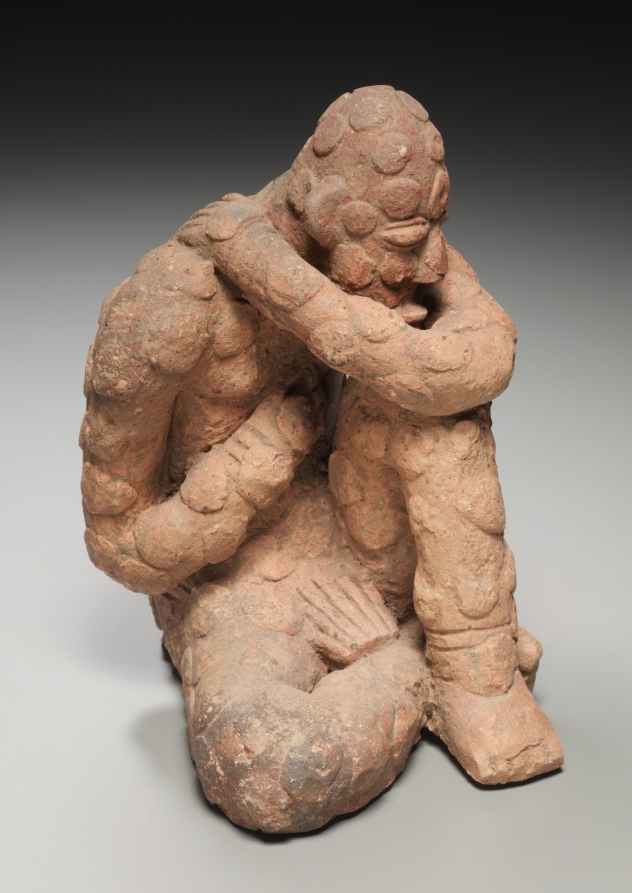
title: Male Figure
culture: Africa, West Africa, Mali, probably Djenné-Djenno, Inland Niger Delta culture-style maker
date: possibly 1300s–1600s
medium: Terracotta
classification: Sculpture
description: Figures like this would have been used in rituals by the ancestors of the present-day inhabitants of the Inland Niger Delta. Representing the gods and kings or queens associated with the region’s former residents, the figures received prayers and offerings in exchange for their support. The seated position of this male has been interpreted as a harmful pose intended to bring death to an individual.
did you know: While we don’t know who made this work, it can be hypothesized that it was a woman; today, as in much of Africa, potters in Mali are female.